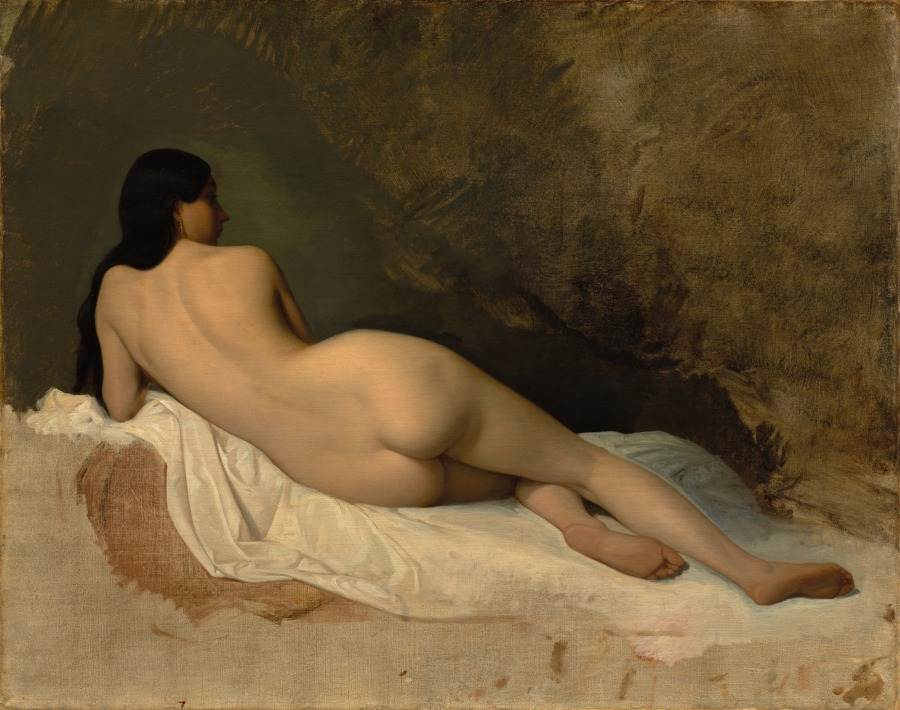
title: Study of a Reclining Nude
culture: France, 19th century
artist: Isidore Pils (French, 1813/15–1875)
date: c. 1841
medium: oil on fabric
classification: Painting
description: The languorous, sensuous pose of this woman is strongly reminiscent of Jean Auguste Dominique Ingres's popular paintings of odalisques, female slaves, and concubines in Turkish harems. Much of this canvas has been left thinly painted or entirely blank, suggesting that it was a figural study rather than a finished work of art. The French Academy in the 1800s viewed the depiction of the nude as the ultimate measure of an artist's skill. Because models changed poses frequently, students had to work quickly and without embellishment. Here the artist completed only those areas needed to emphasize the contours of the model's body.